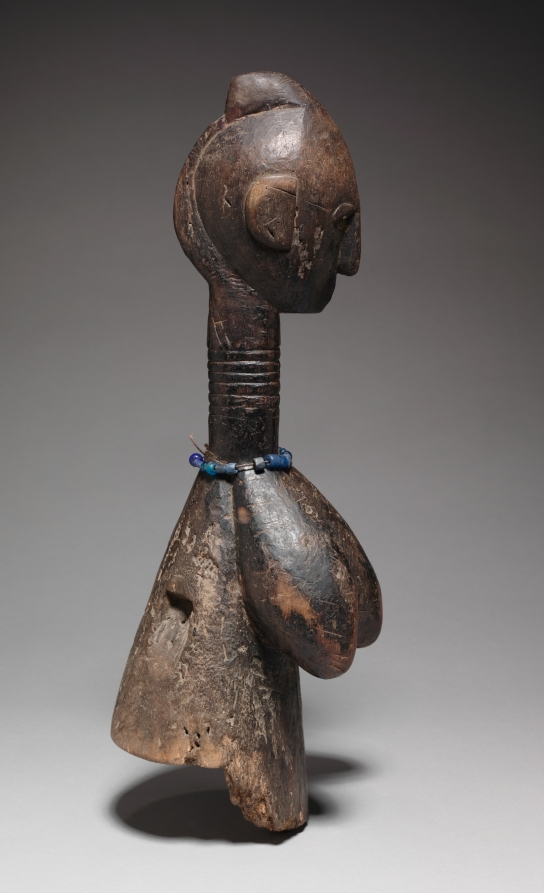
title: Headdress (Zigiren-Wɔndɛ)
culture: Africa, West Africa, Guinea, Baga-style carver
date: early to mid-1900s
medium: Wood, glass beads, upholstery studs, and natural fiber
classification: Mask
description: Owned and used for entertainment by young unmarried men only among some Baga subgroups, this type of headdress is said to represent the Maiden, a beautiful young woman. With a beaded necklace and eyes embellished with furniture tacks, the headdress was attached to a cone-shaped costume consisting of colorful cloths and raffia and constructed over a bamboo armature.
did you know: The performer of this mask grasped the projecting "legs" to steady it while balancing it on his head.